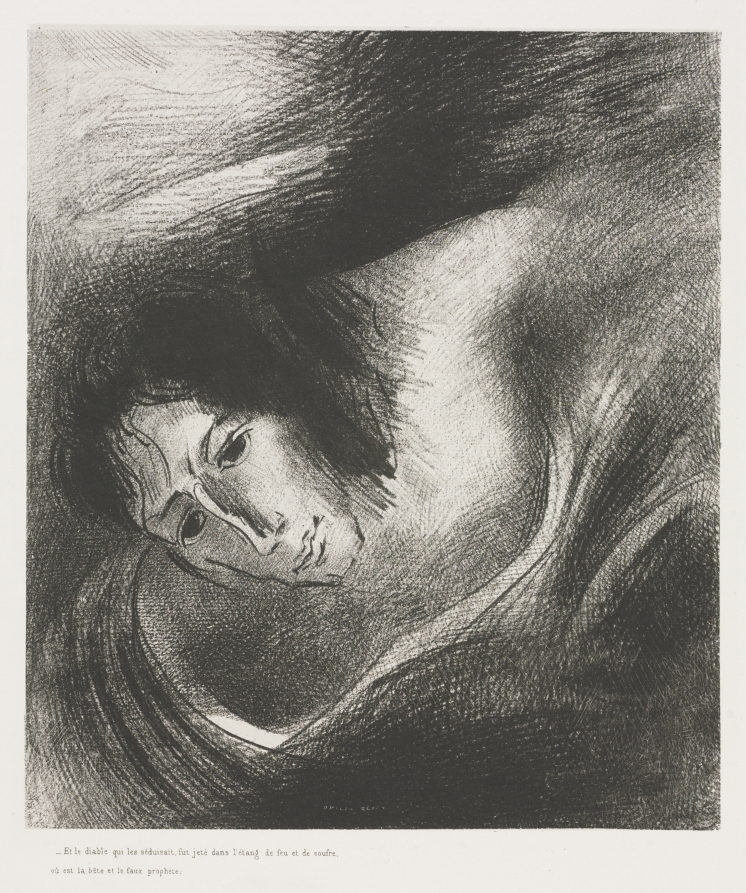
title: And the Devil That Deceived Them was Cast into the Lake of Fire and Brimstone, Where the Beast and the False Prophet Are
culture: France, late 19th Century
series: The Apocalypse of Saint John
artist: Odilon Redon (French, 1840–1916)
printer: Blanchard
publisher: Ambroise Vollard (French, 1867–1939)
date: 1899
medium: lithograph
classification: Print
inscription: signed on stone at bottom center: ODILON REDON; printed at lower left, below image: Et le diable qui les séduisait, fut jeté dans l'étang de feu et de soufre, / où est la bête et le faux prophète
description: The last of Odilon Redon’s 11 lithographic portfolios, this series relates to the Book of Revelation from the Christian Bible. The subject had been explored throughout art history, allowing the artist to align himself with past masters, such as Albrecht Dürer. Although Redon often vaguely referenced texts, these prints directly illustrate 12 individual passages, including one about a woman clothed with the sun and another focused on a great star falling from heaven. By the time he created this portfolio, Redon’s reputation was well established. The project was published by art dealer Ambroise Vollard, who began to sell and promote Redon’s work about a year earlier, building a market for his prints in Paris and abroad.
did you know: This is one of the last works where Redon experimented with lithograph and all-black medium. In contrast, bright, dazzling colors characterize his late works.